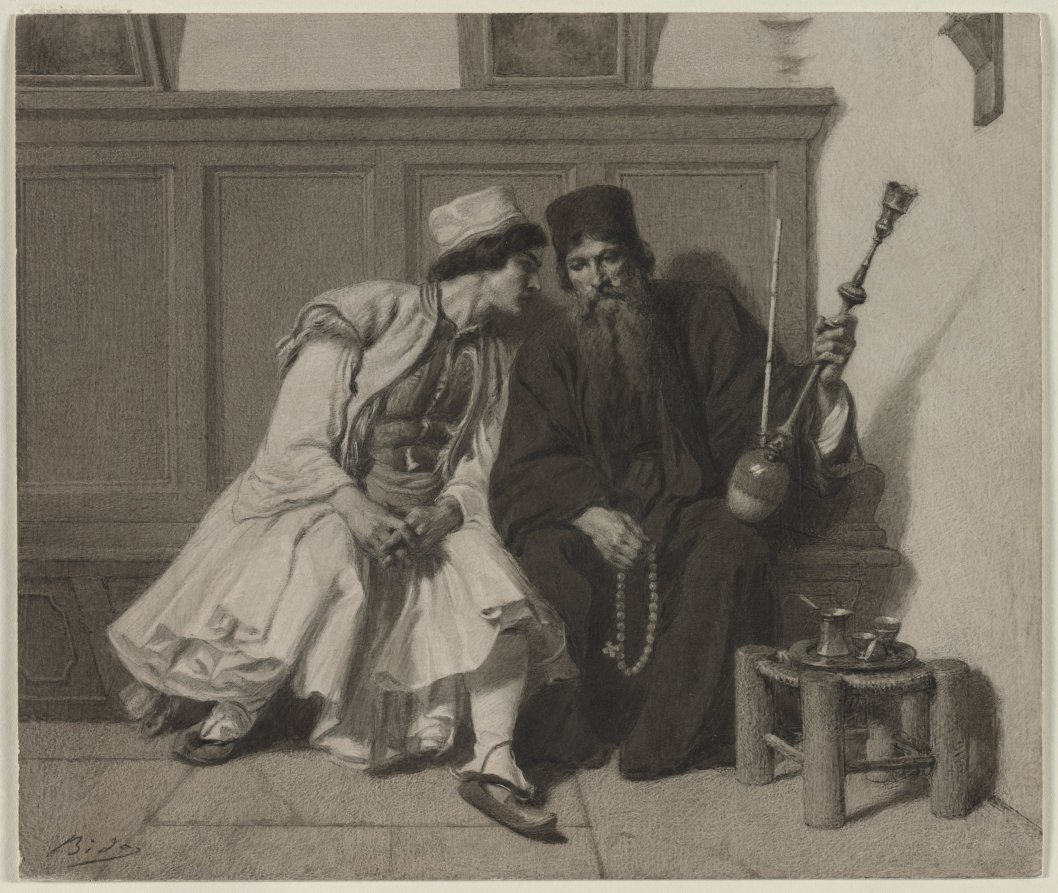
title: Young Greek Man in Conversation with a Priest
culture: France, 19th century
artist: Alexandre Bida (French, 1823–1895)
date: second half 19th century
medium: brush and gray wash, with black chalk and white gouache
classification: Drawing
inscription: signed, lower left, in black chalk: Bida [underlined]